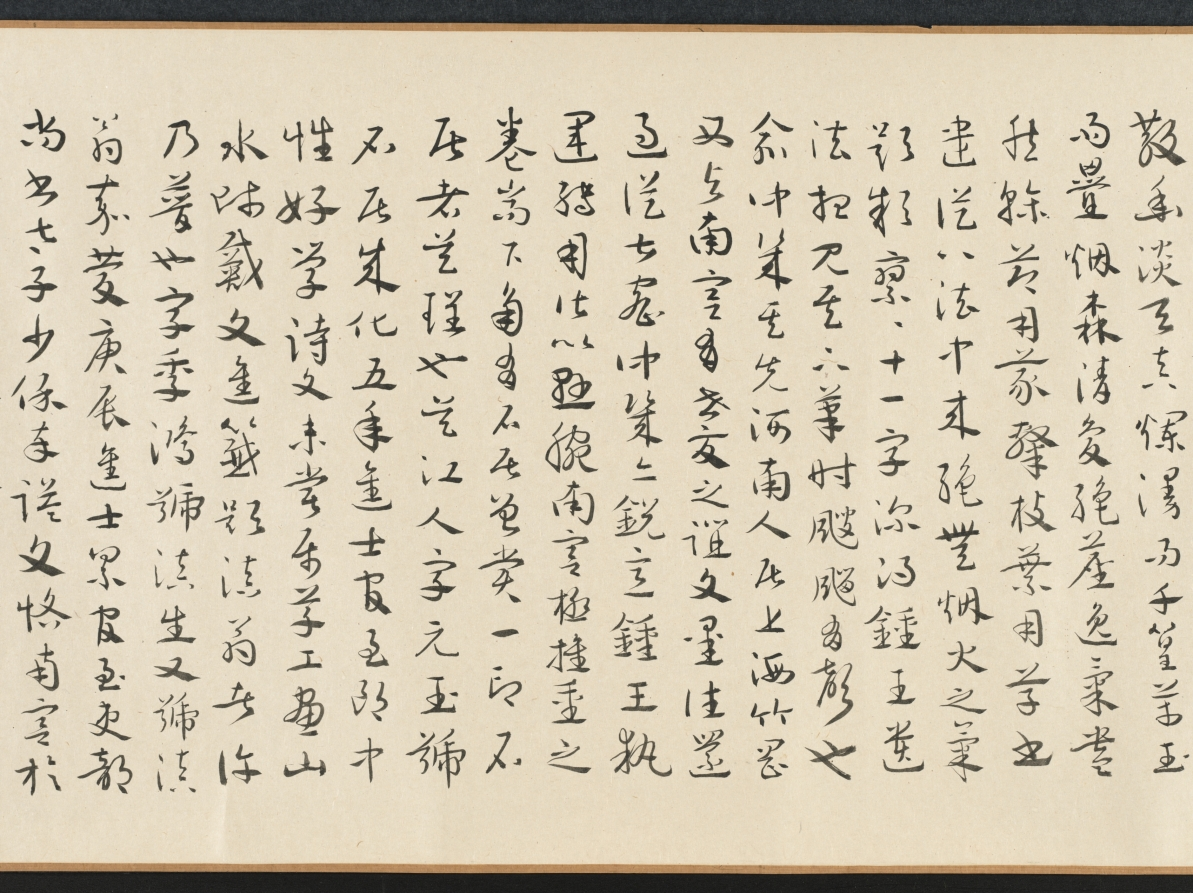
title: Landscape with Bamboo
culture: China, Yuan dynasty (1271-1368)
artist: Song Ke (Chinese, 1327–1387)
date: 1300s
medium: Handscroll; ink on paper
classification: Painting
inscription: 東吳宋克戲為仲幾畏友圖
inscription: 2 colophons and 14 additional seals: 1 seal of Yü Chung-chi (14th c.); 1 seal of Wu Ch'eng (1469 jinshi); 1 colophon and 2 seals of Wu K'uan (1435–1504); 1 colophon and 9 seals of Cheng Qi (1911–1988); 1 seal unidentified.